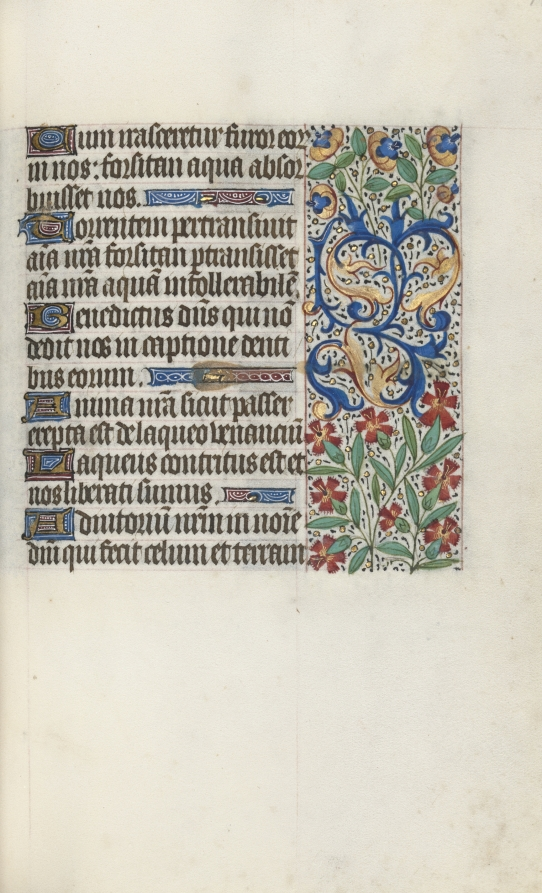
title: Book of Hours (Use of Rouen): fol. 71r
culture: France, Rouen, 15th century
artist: Master of the Geneva Latini (French, active Rouen, 1460–80)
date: c. 1470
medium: ink, tempera, and gold on vellum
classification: Bound Volume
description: In the late 1400s and early 1500s Rouen was an established and important center of book production. The city’s cathedral had a wealthy chapter that spent large sums of money to commission books and to maintain its extensive library. The stationers and booksellers would have likely been concentrated in or near the cathedral precinct. This artist, named after a manuscript now in Geneva, was Rouen’s principal illuminator during the second half of the 1400s.